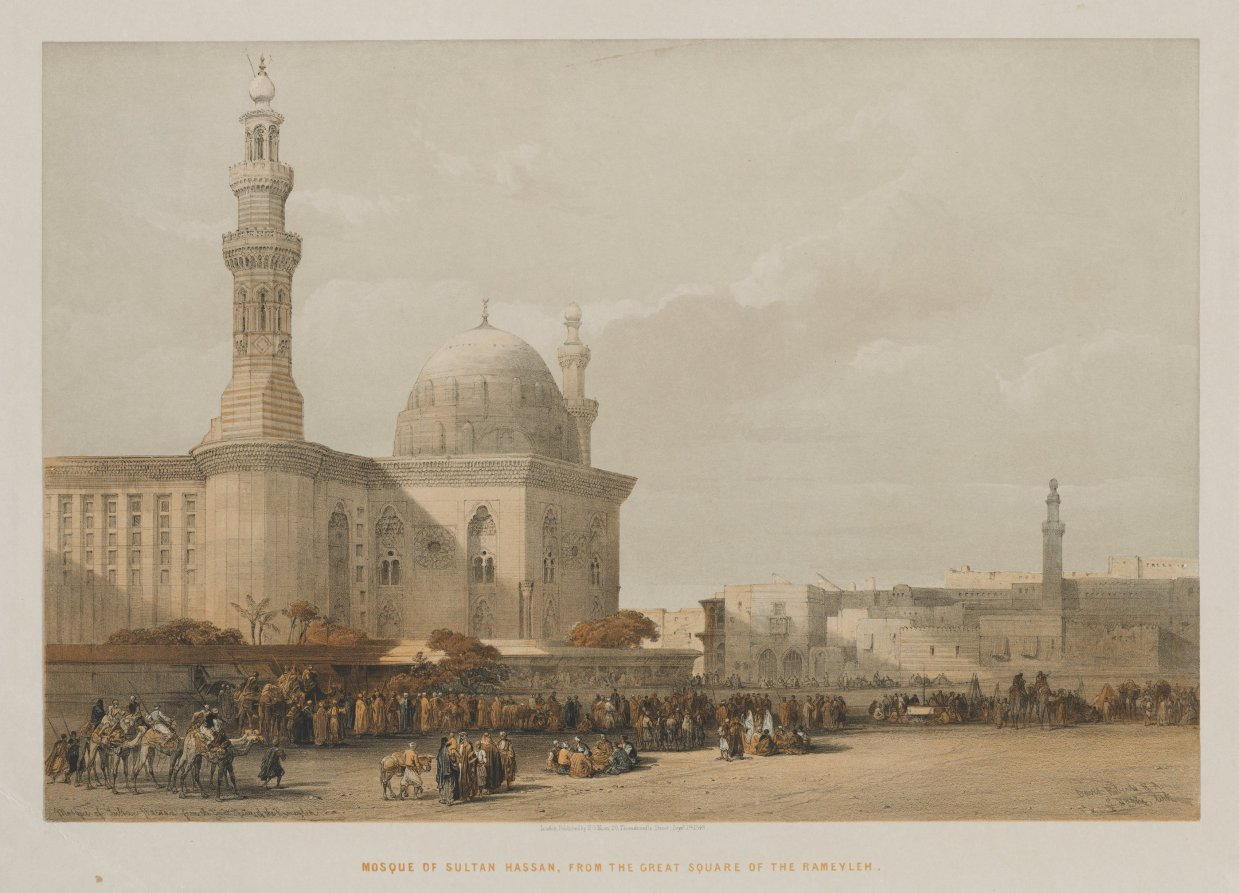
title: Egypt and Nubia, Volume III: Mosque of Sultan Hassan, from the Great Square of the Rameyleh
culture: England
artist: Louis Haghe (British, 1806–1885)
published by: F. G. Moon, 20 Threadneedle Street, London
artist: after David Roberts (Scottish, 1796–1864)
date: 1849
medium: color lithograph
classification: Print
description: By the mid-1800s, the complexities of printing in numerous colors had been mastered, culminating in one of the high points of European printmaking. The plates drawn by Louis Haghe, which copy the watercolors that David Roberts made in Egypt, are examples of color lithography. Haghe, a Scottish topographical and architectural artist, spent a year traveling across this ancient land in 1838. The resulting prints––the first comprehensive series of views of the monuments, landscapes, and people of the Near East––were appreciated for their brilliant color and large scale.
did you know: The Mosque of Sultan Hassan was built near the Citadel of Cairo between 1356 and 1363.